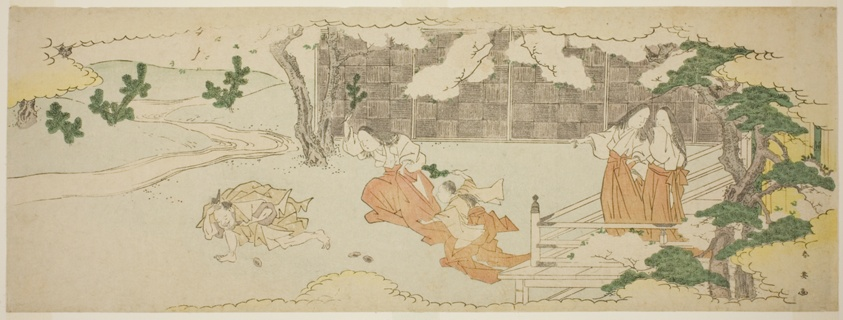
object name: Print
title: Court Ladies on a Balcony Watching a Woman and a Girl Chasing a Man in the Yard under Blossoming Cherry Trees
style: Japanese (culture or style)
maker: Katsukawa Shun'ei (Japanese, 1762-1819)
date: late 1790s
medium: Color woodblock print; long surimono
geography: Japan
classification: woodblock print; print; asian art